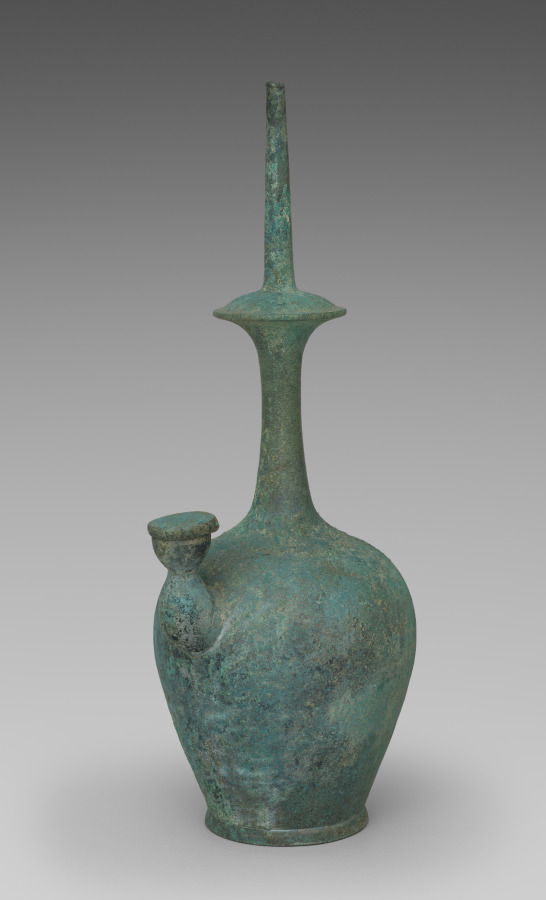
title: Water Ewer for Rituals (Kundika)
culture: Korea, Goryeo dynasty (918–1392)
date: 1100s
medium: bronze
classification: Metalwork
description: Known as kundika in Sanskrit, this distinctively shaped vessel served to purify a sacred space and to invoke a deity. In Korean Buddhist art, it appears primarily as an attribute of the Bodhisattva Avalokitesvara (Gwaneum in Korean). By the 1100s, however, the kundika was used as aristocrats’ fancy water container for everyday use.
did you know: This distinctively shaped vessel is called a kundika in Sanskrit, simply referring to a water bottle.